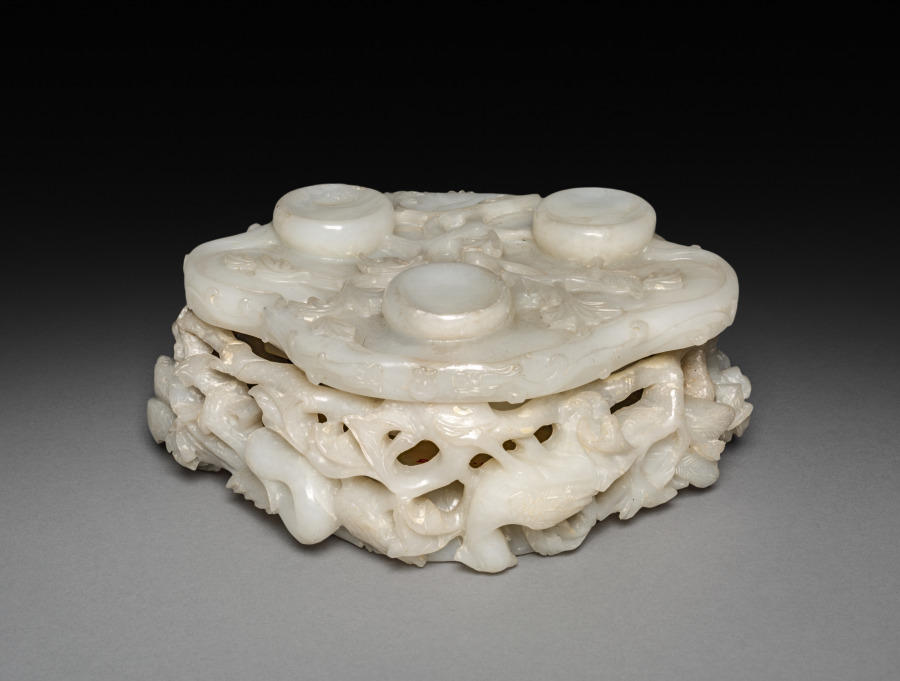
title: Three-Sectional Altar Group: Koro with Lid and Base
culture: China, Qing dynasty (1644-1911)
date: 1644–1911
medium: jade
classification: Jade